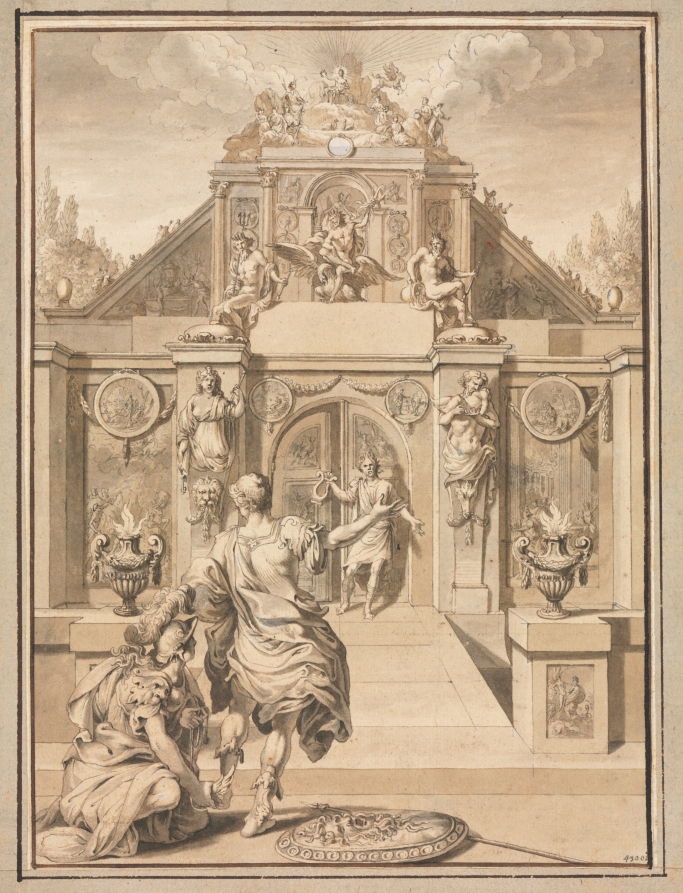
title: Perseus and Minerva before a Temple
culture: Netherlands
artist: Jan Goeree (Dutch, 1670–1731)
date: early 1700s?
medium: pen and brown ink, brush and brown and gray wash, over traces of red chalk, heightened with white gouache; framing lines in brown ink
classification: Drawing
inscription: in gray ink, lower right: 4300 ; VERSO OF SECONDARY SUPPORT, lower right, in brown ink: Van Orlaÿ ; center, in graphite: C. [de?] R.